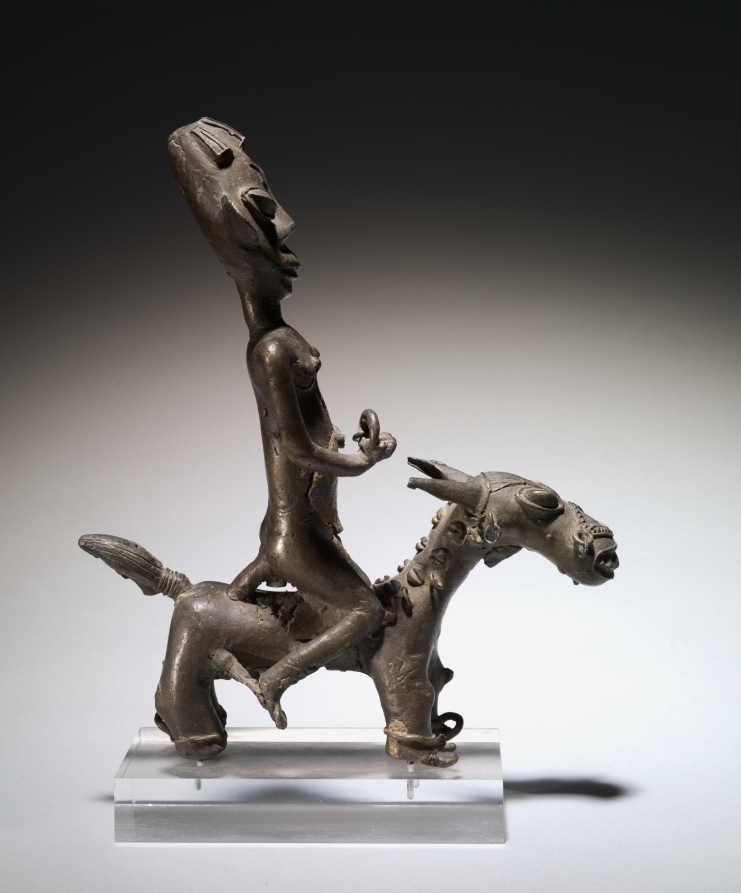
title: Altar figure (onílé)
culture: Africa, West Africa, Nigeria, Yorùbá-style maker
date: possibly 1700s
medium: Copper alloy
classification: Sculpture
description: This figure of a horse and rider is related to the Ògbóni society, whose responsibilities include the burial of titleholders and leaders and the judgment and punishment of criminals. A counterweight to the authority of the king, it is also responsible for the selection, installation, and removal of rulers. Probably once forming a pair with a female figure, the equestrian symbolized the king’s male ancestors.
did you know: Images of horses and riders cast in copper alloy are rare among Yoruba sculptures.